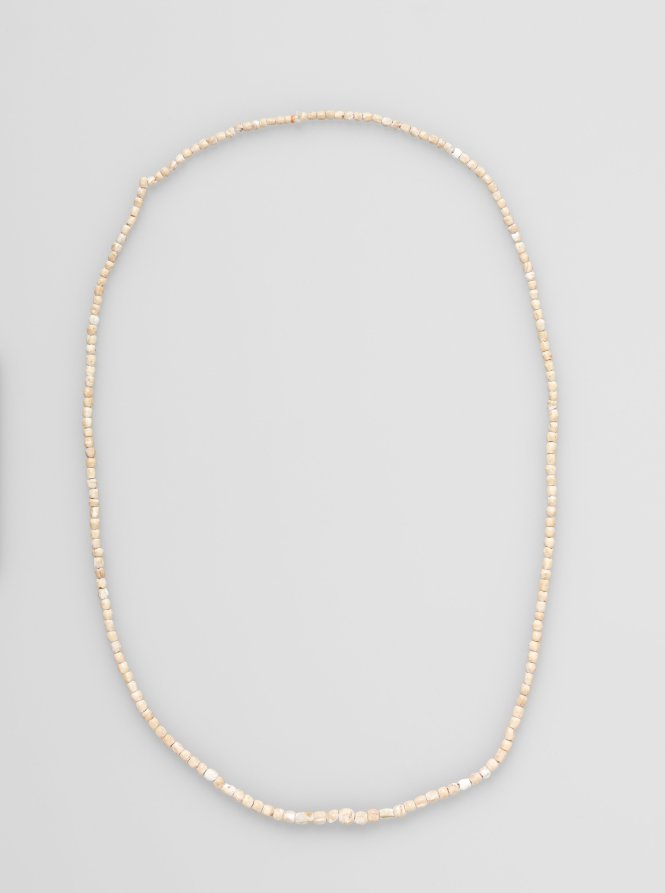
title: Necklace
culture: Peru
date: before 1532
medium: polished stone beads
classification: Jewelry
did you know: These ancient beads were restrung in modern times.